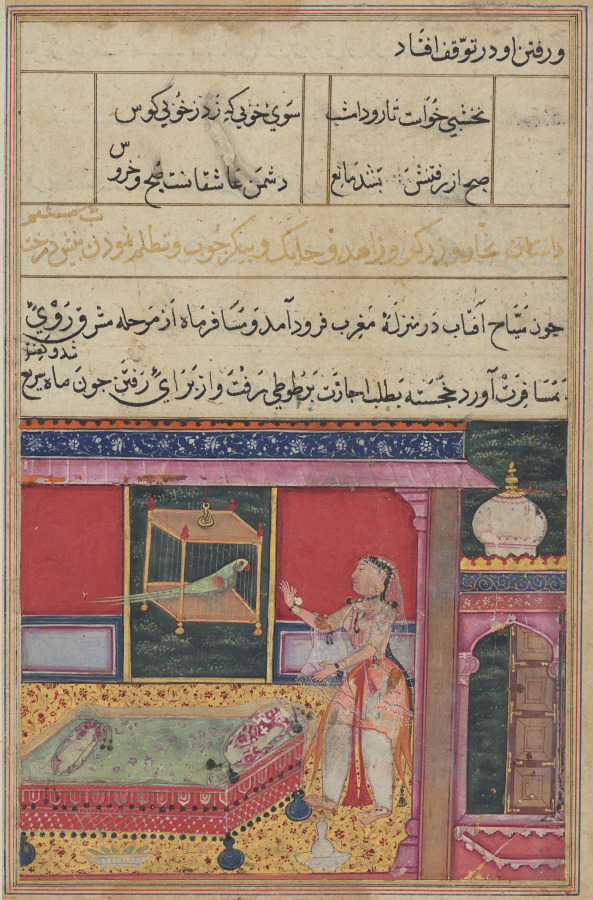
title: The Parrot Addresses Khujasta at the Beginning of the Sixth Night, from a Tuti-nama (Tales of a Parrot)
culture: Mughal India, court of Akbar (reigned 1556–1605)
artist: Dasavanta (Indian)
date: c. 1560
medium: gum tempera, ink, and gold on paper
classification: Painting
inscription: ['amal da]s[wa]nt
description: Tuti the parrot begins to tell Khujasta the story of seven men who became enamored with the statue of a woman that came to life. A Persian inscription in the lower margin attributes this page to the painter Dasavanta. The golden carpet and soft tufts of grass are similar to those found on folio 32v, also attributed to Dasavanta.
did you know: Dasavanta was a mural painter discovered by emperor Akbar, who had him trained in the royal atelier.